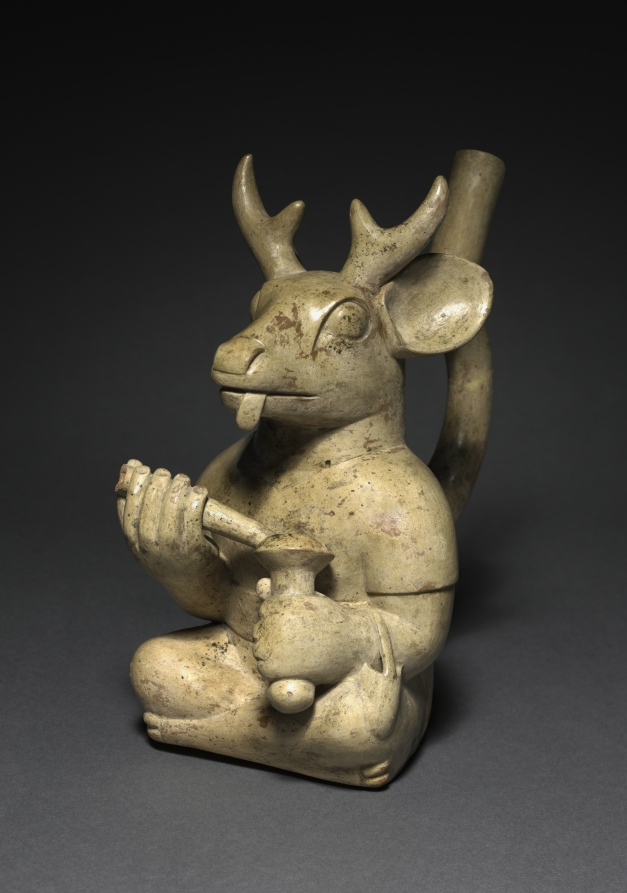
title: Deer-Headed Figure Vessel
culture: Central Andes, North Coast, Moche people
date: 200–850 CE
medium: ceramic, slip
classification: Vessels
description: Moche imagery includes an intriguing world of creatures that mingle traits from different realms: beans sprout human legs and race up a spout, jars leap with human feet to pour themselves, and animals wield weapons in two hands. This figure, with a stag’s head but a human’s body, is an example. He is engaged in a coca-leaf chewing ritual and thus holds a bag for the leaves along with a container of powdered lime that is one of the ritual’s key ingredients.